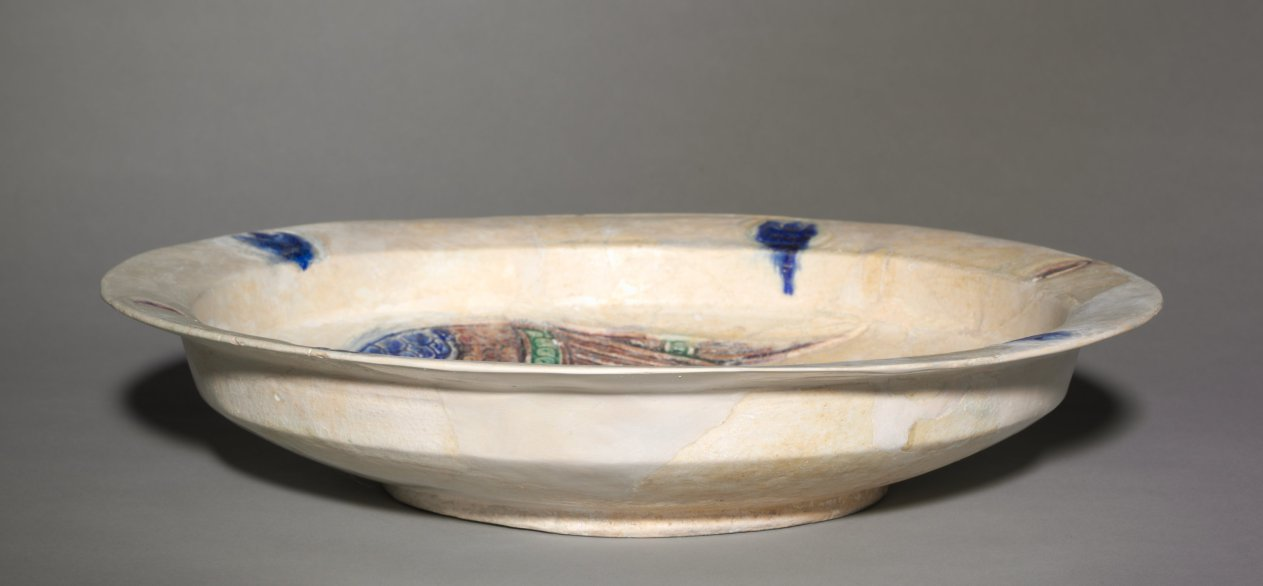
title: Dish with Falcon Attacking a Water Bird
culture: Syria, possibly Tell Minis, Zangid (1127–1251) or Ayyubid period (1171–1260)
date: 1100s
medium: Fritware with carved decoration and underglaze design, Lakabi ware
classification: Ceramic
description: The development of fritware in the Islamic world revolutionized ceramic production and was likely influenced by the import of Chinese porcelain. Fritware was largely made of quartz with small amounts of crushed glass and fine clay in order to produce a white body. The carved surface with raised outlines allowed glazes of different colors to be side by side without running together when fired.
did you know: Sanctioned by the Qur'an (5:4-6), falconry was for many centuries a favorite sport of Muslim rulers.